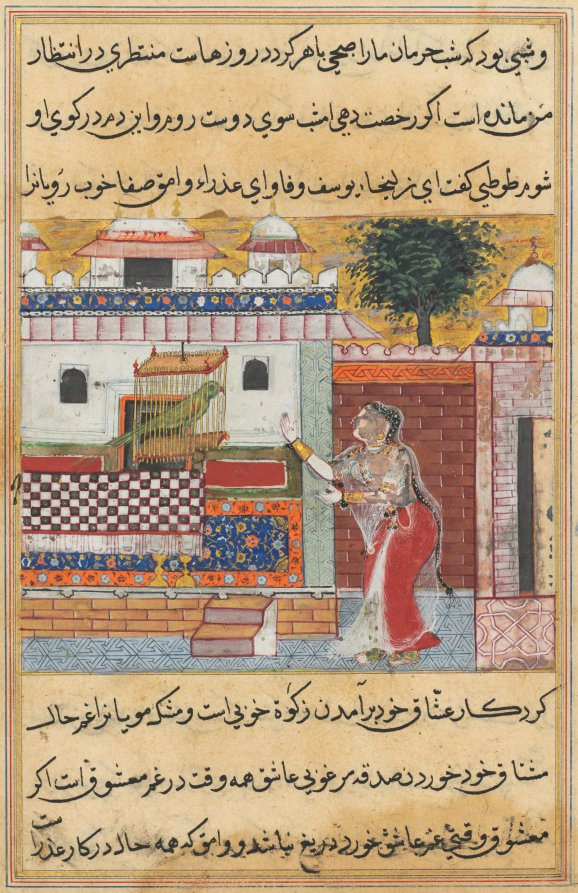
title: The Parrot Addresses Khujasta at the Beginning of the Twelfth Night, from a Tuti-nama (Tales of a Parrot)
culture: Mughal India, court of Akbar (reigned 1556–1605)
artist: Tara 1 (Indian, active 1550s-1590s)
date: c. 1560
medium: gum tempera, ink, and gold on paper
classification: Painting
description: Every night for 52 nights the sly domesticated parrot encourages his master's wife Khujasta to meet her lover under cover of darkness. Just before she leaves, he mentions a topic from a tantalizing tale; she becomes so curious that she cannot go out before hearing the whole story. By the time the story ends, dawn breaks, and it is too late for her to go out unnoticed. The gold sky and geometric tile patterns are derived from Persian sources while Khujasta's figure shown in profile and style of dress are purely Indian. The artist has chosen to tilt the carpet up in defiance of realistic perspective to show off the fine arabesque motif. The checkered bedspread calls attention to the empty bed and Khujasta's longing to be with her lover.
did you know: The gauzy fabric that Khujasta wears over her sari is called an odhani.